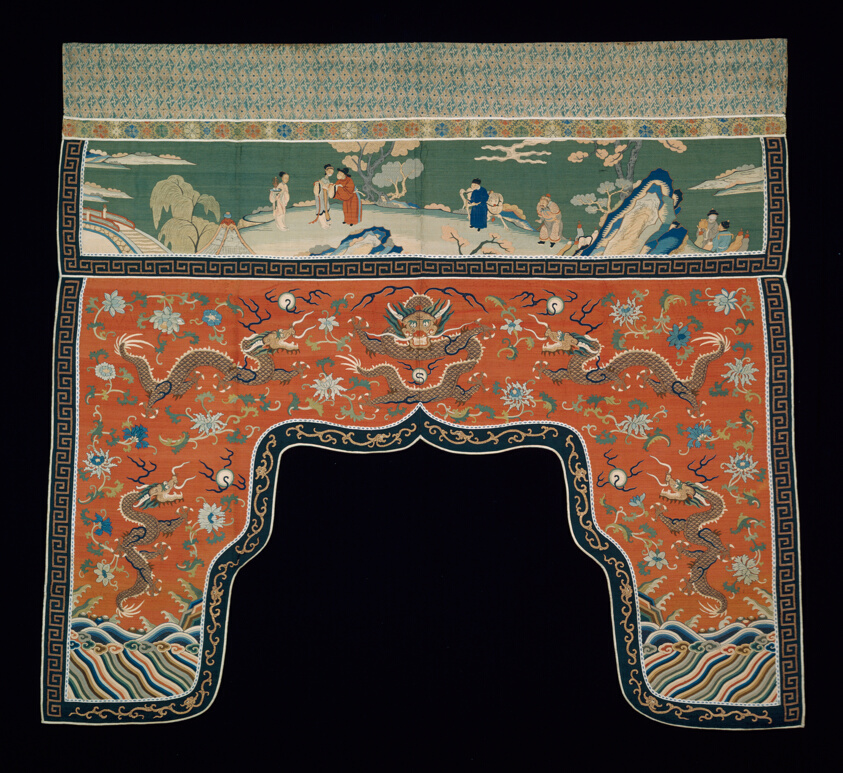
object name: Textile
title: Valance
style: qing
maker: China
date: Qing dynasty (1644–1911), 1799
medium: Top: cotton, plain weave; block printed; narrow band: silk, warp-float faced 5:1 satin weave with weft-float faced 1:2 'S' twill interlacings of secondary binding warps and supplementary patterning wefts; upper and lower panels: silk and gold-leaf-over-lacquered-paper-strip-wrapped silk, slit tapestry weave with interlaced outlining wefts; painted details; outer bands: silk and gold-leaf-over-lacquered-paper-strip-wrapped silk, dovetailed tapestry weave; ribbon: silk, plain weave with supplementary patterning warps; outer edging: silk, warp-float faced 4:1 satin weave; lined with cotton, plain weave; painted inscription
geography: China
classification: textile; weaving